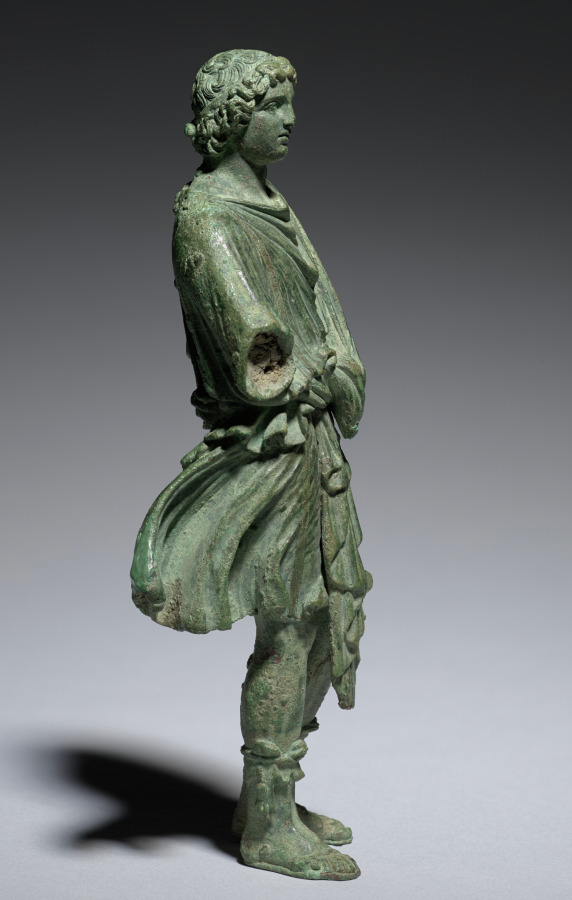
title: Lar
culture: Italy, Rome, Early Imperial period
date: 1–25 CE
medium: bronze with copper inlays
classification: Sculpture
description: This youthful bronze figure wears a short tunic with copper inlaid stripes and open-toed boots with animal-skin liners. The figure’s arms are missing, but based on other surviving examples, they likely held a libation dish and cornucopia. Even without these attributes, the figure can be identified through dress and stance as a type of Lar, or domestic deity, known as the Lar Familiaris (Household Lar), standing in a characteristic "quiet pose." Other types of Lares include the Lares Compitales and Lares Augusti (Lares of crossroads and of Augustus, respectively).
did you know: This statuette likely stood with other small bronzes in a household shrine called a lararium.